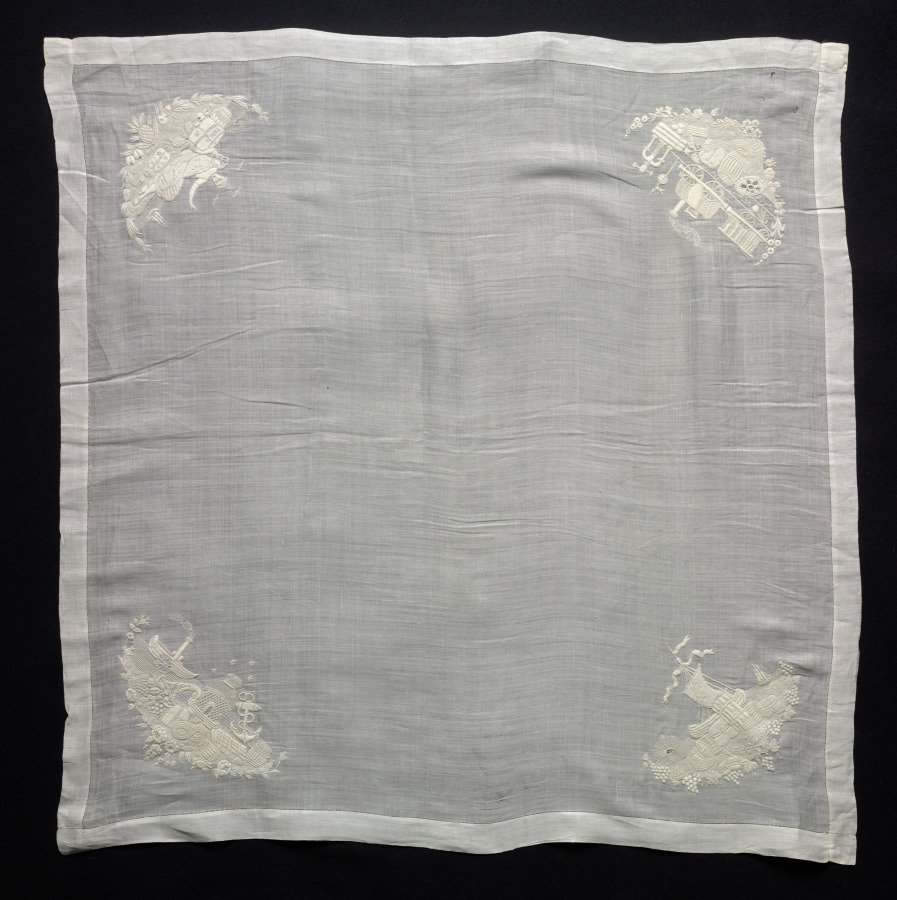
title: Embroidered Handkerchief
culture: Italy(?)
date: 1800s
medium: Plain weave linen, embroidered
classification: Embroidery